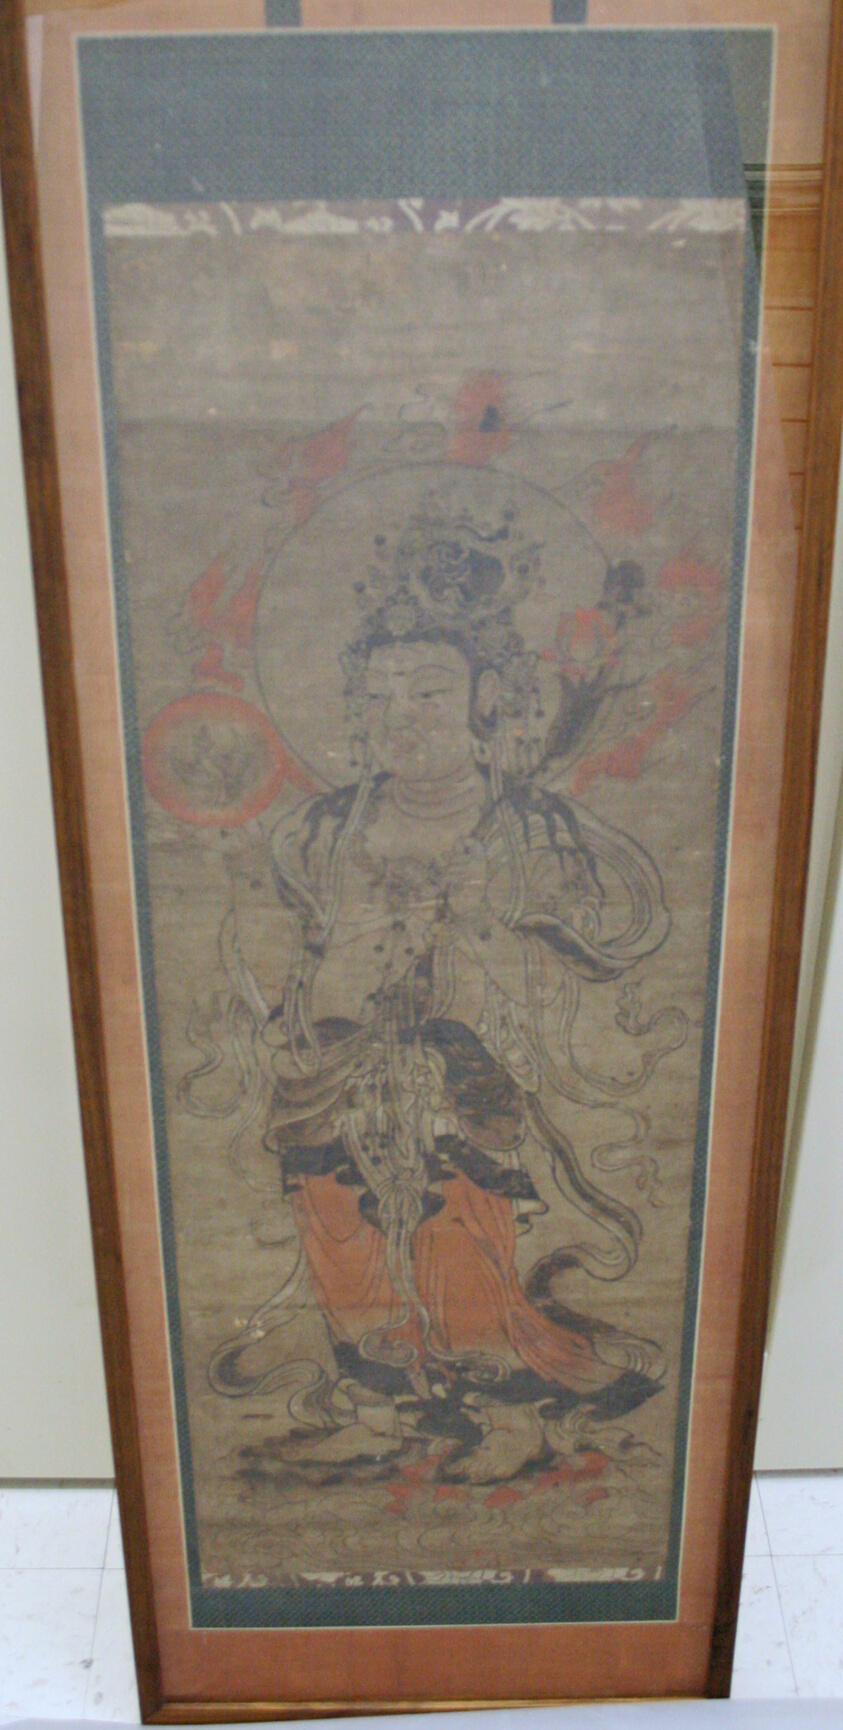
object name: Print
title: Nitten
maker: Artist Unknown; Japanese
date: 15th century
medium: Hand-colored woodblock print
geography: Japan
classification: woodblock print; print; asian art